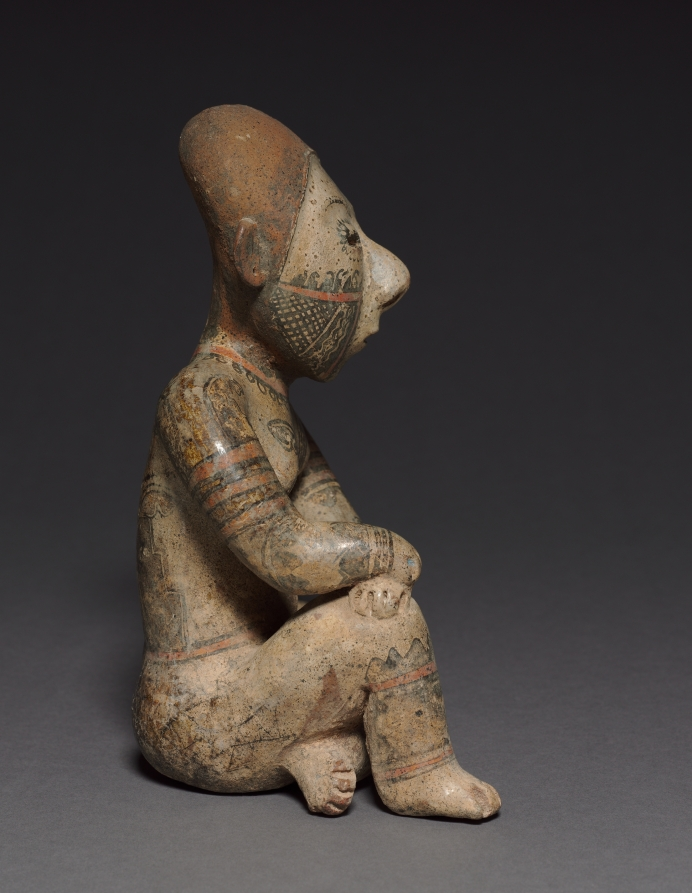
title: Seated Female Figure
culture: Mexico, Nayarit, Chinesco Style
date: c. 100 BCE–300 CE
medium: earthenware with burnished, colored slips and resist patterning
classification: Sculpture